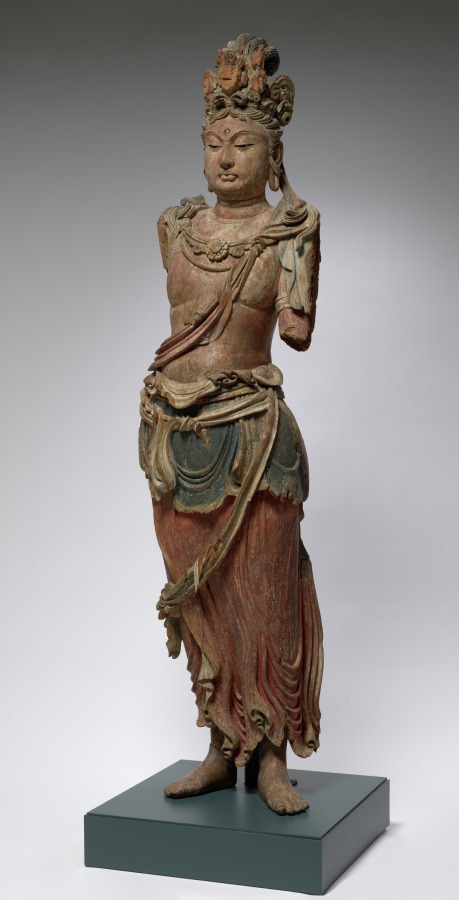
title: Eleven-Headed Guanyin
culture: China, late Northern Song dynasty (960-1127) - Jin dynasty (1115-1234)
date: 1100–1200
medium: wood with polychromy and cut gold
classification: Sculpture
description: The bodhisattva is an enlightened being dedicated to the spiritual awakening of all beings. The compassionate bodhisattva Guanyin, in a variety of manifestations, is probably the most popular deity of worship in Chinese Buddhism. In the Esoteric Buddhist form shown here, this standing Guanyin has a total of eleven heads, with smaller ones above the principal head. The uppermost head represents the Buddha Amitabha, to whom he is closely related. The eleven heads symbolize the Buddha’s steps on the path to enlightenment.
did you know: This Guanyin is carved from a single block of willow (genus Salix sp.).